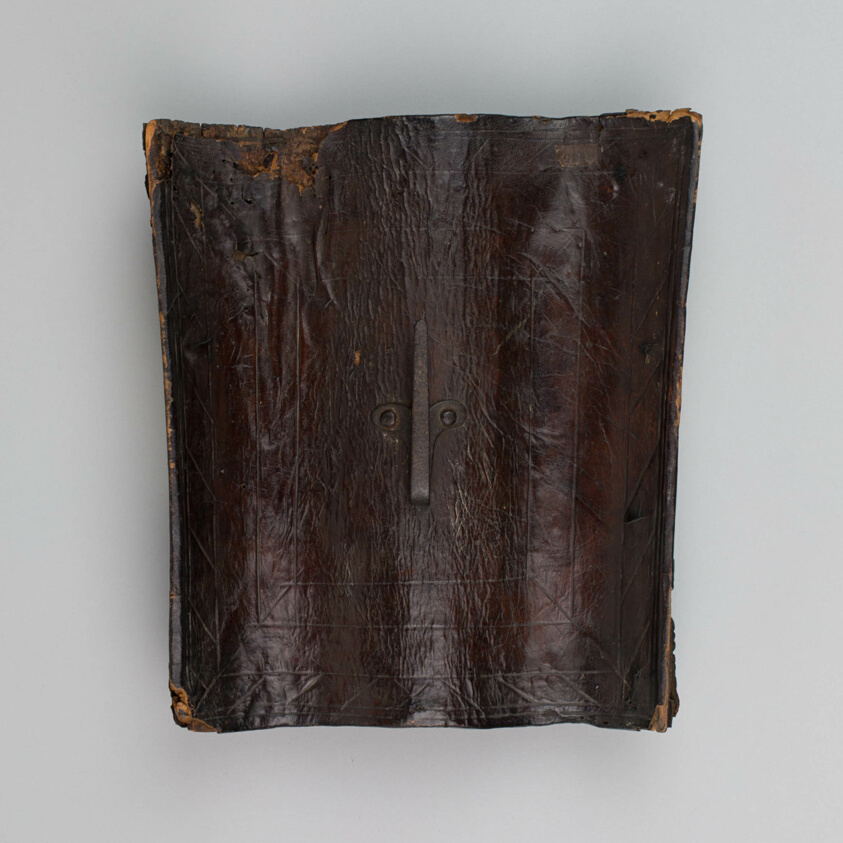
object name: Armor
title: Buckler (Targa)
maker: Italian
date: 1550/75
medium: Wood, leather, and iron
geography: Italy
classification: shield; armor; arms and armor